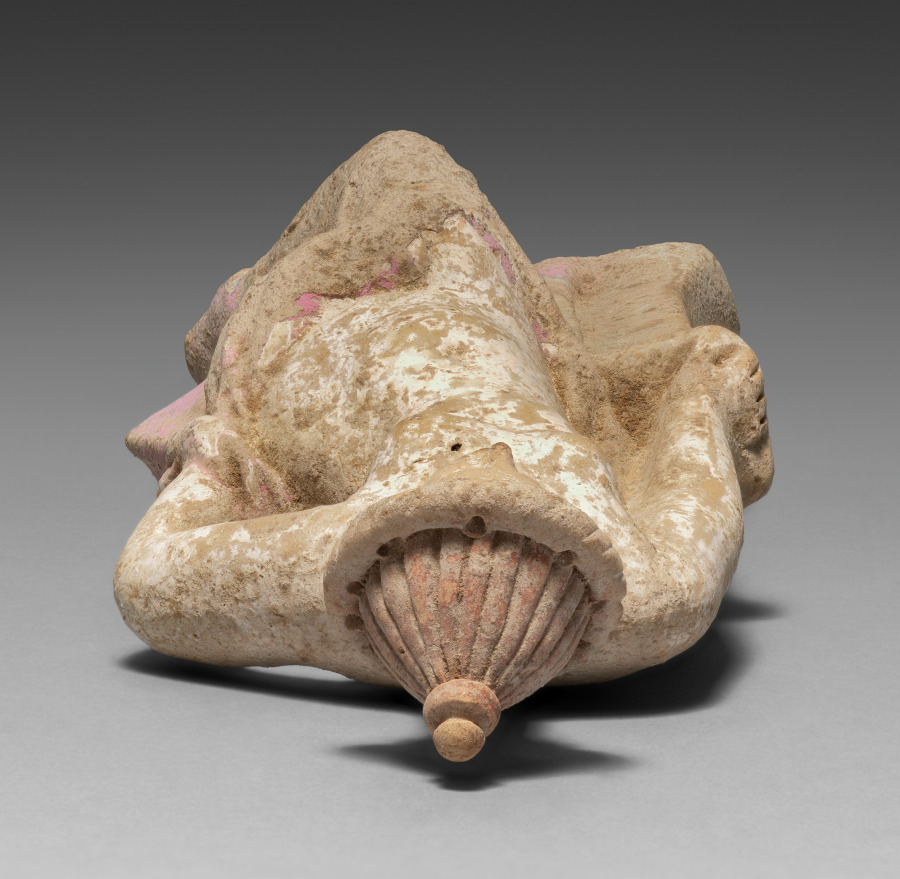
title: Figurine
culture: Greece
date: 300–100 BCE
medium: terracotta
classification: Sculpture